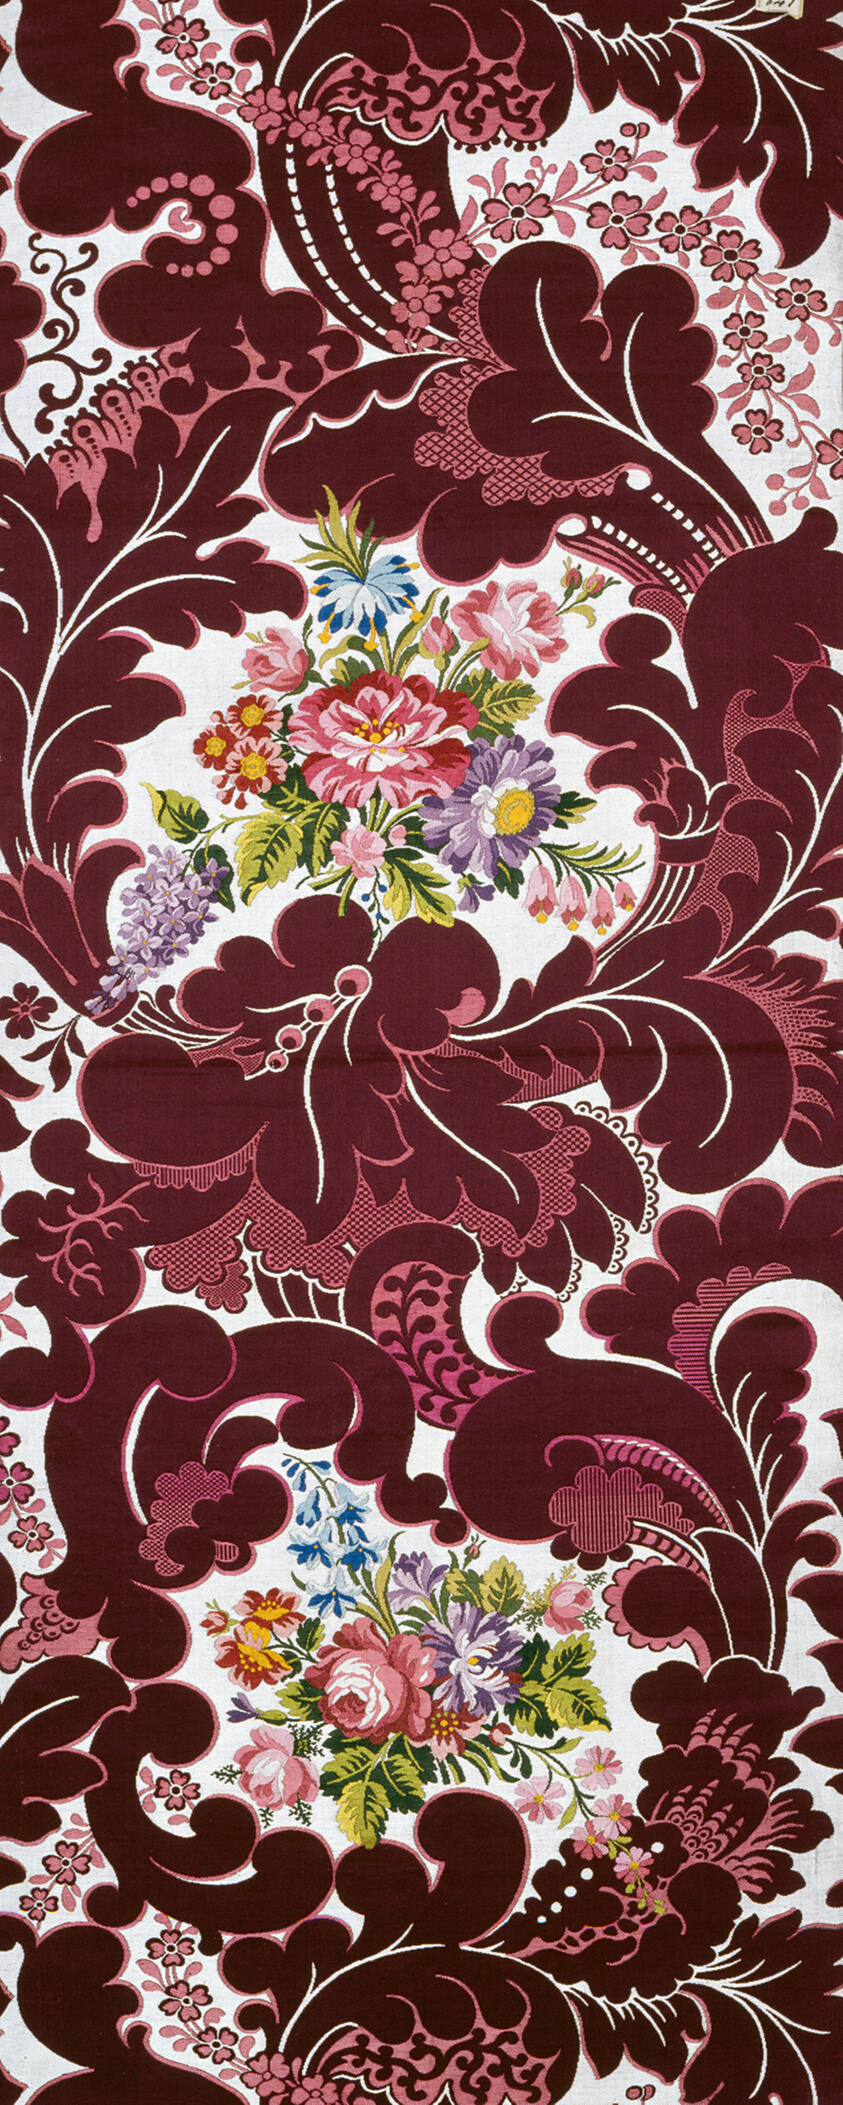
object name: Textile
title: Panel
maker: Produced by Mathevon et Bouvard, 1810–1895; France, Lyon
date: 1860/80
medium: Silk and linen, warp-float faced 7:1 satin weave with 1:2 'S' or weft-float faced 1:2 twill interlacings of secondary binding warps and supplementary patterning and brocading wefts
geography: France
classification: textile; weaving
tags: foliage, flowers